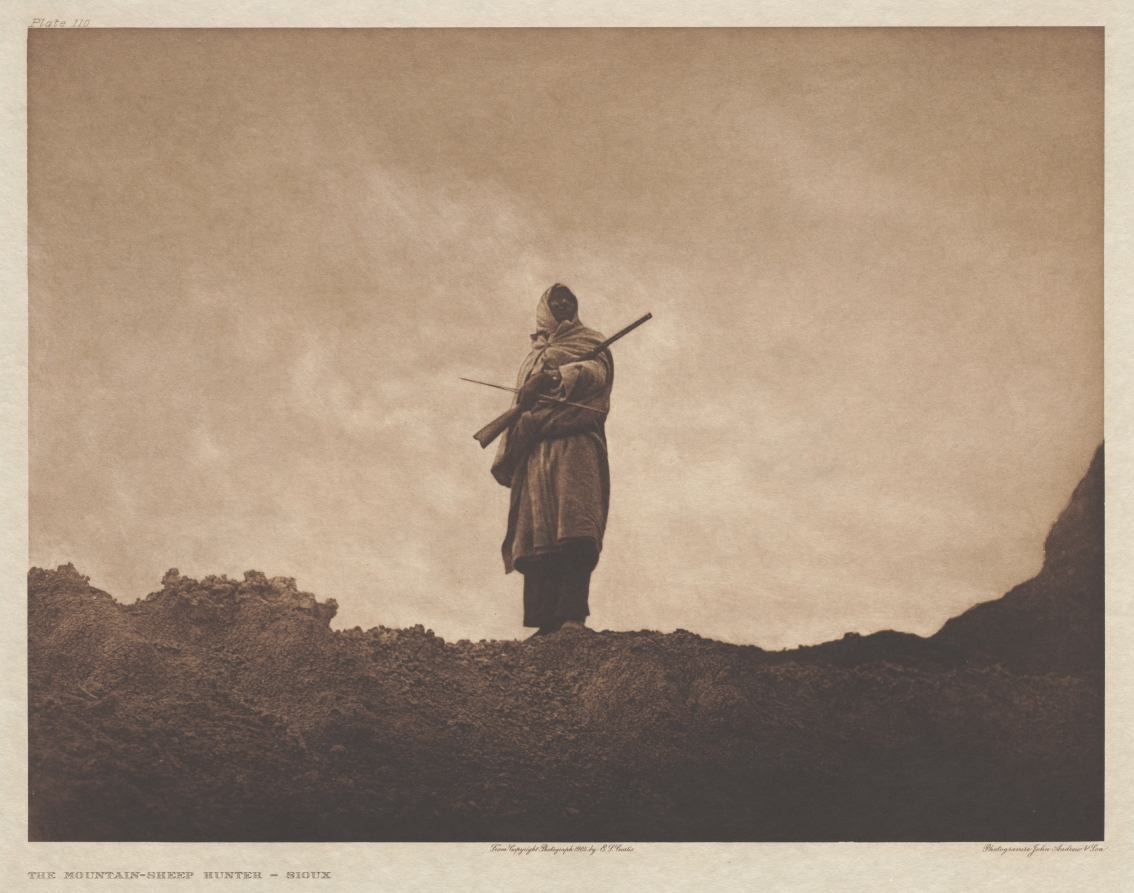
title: Portfolio III, Plate 110: The Mountain-Sheep Hunter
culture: America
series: The North American Indian: being a series of Portfolios picturing and describing the Indians of the United States, the Dominion of Canada, and Alaska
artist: Edward S. Curtis (American, 1868–1952)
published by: The University Press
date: 1904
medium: photogravure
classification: Portfolio